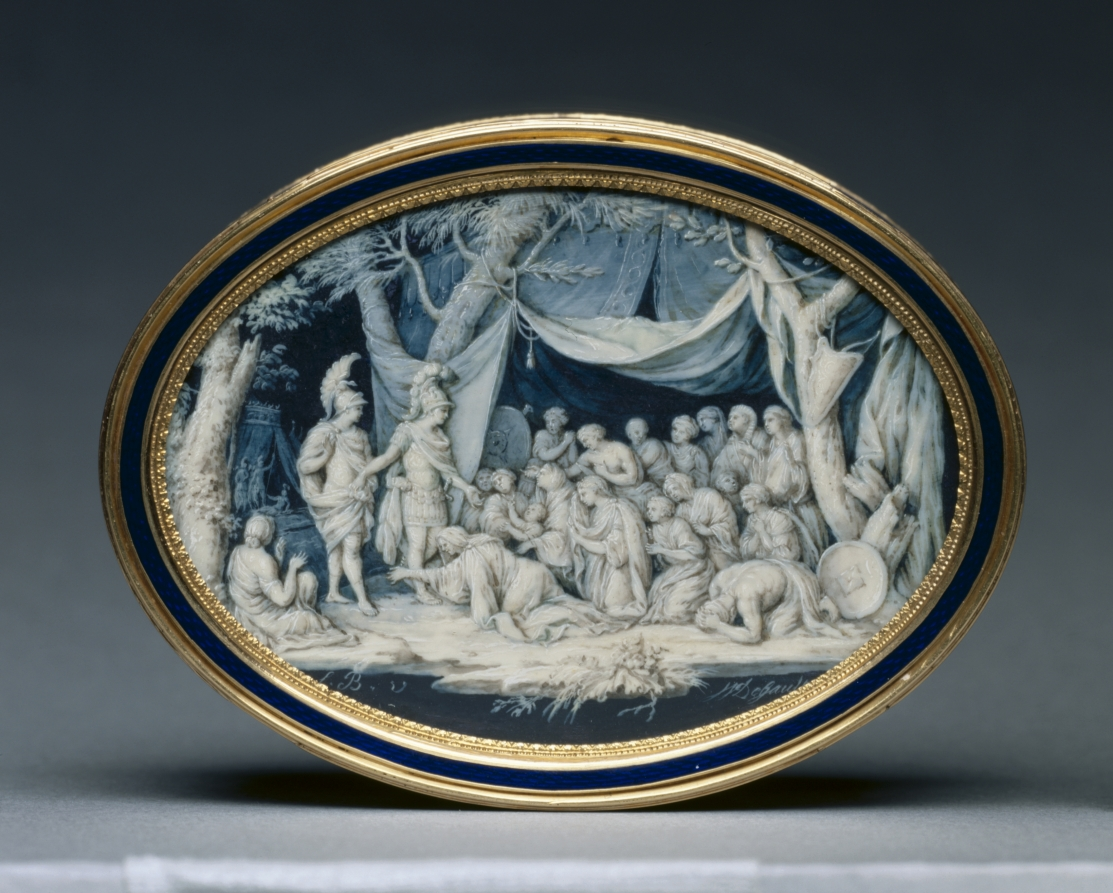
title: Snuff Box (Tabatière)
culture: France, 18th century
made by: Pierre Marie Gault De Saint-Germain (French, 1754–1842)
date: 1779–80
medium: gold and enamel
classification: Miscellaneous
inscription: [Warden's mark for Paris, 1779-1780, inside bottom; inside cover]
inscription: [Illegible maker's mark, inside bottom; inside cover]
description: Decorated with images derived from ancient Greek and Roman history in the style of cameos, intricately carved gemstones, this box evokes the rising neoclassical imagery in France. The scenes on the box recount several key events in the life of Alexander the Great. The enameled works were inspired by a series of prints by Sébastien Leclerc which drew from a series of paintings by Charles Le Brun.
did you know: The original series painted by Charles Le Brun, The Battles of Alexander (Les Batailles d’Alexandre) (1600s), was commissioned by King Louis XIV of France.